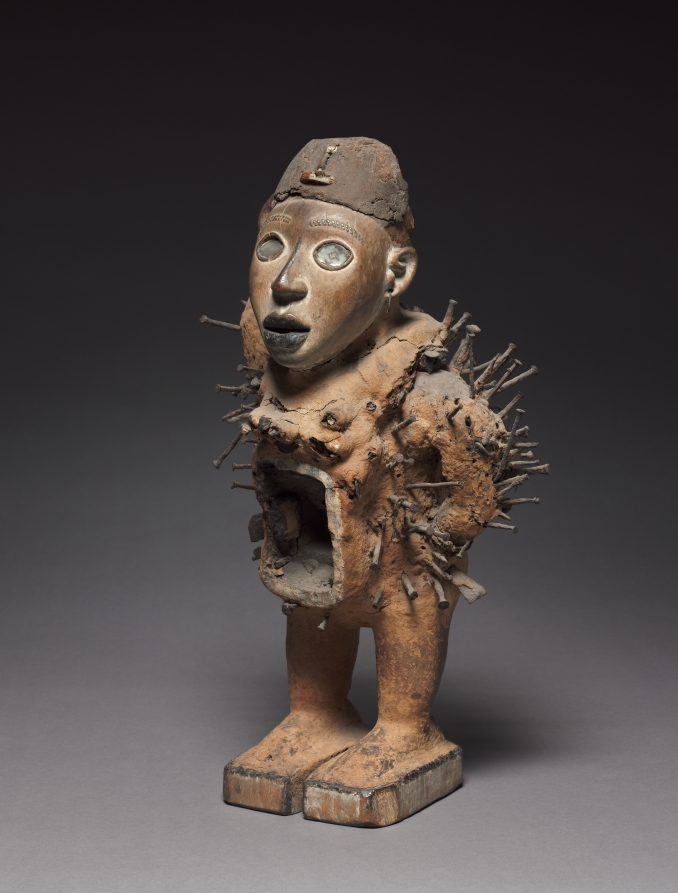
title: Male figure (nkisi nkondi)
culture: Democratic Republic of Congo or Cabinda (Angola), Kongo artist and nganga (priest)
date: late 1800s-early 1900s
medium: Wood, metalized glass, iron, organic material, ivory or plastic, and natural fiber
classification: Sculpture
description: This nkisi nkondi (power figure) lacks most of the materials that transformed it into a vessel for a spirit. Carved by sculptors, minkisi hosted spirits after banganga (priests) placed substances inside to empower them. The mirrored eyes, resin cap, and stomach chamber once contained empowering materials. After the nkisi had served its purpose the nganga removed the materials, stripping it of its spiritual power; the remaining sculpture was discarded. Sometimes, Kongo people removed materials as acts of anti-colonial resistance, disempowering minkisi before Europeans seized them. While we don’t know why it was disempowered, this sculpture is no longer spiritually active.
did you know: A mix of locally made and imported metal nails, blades, and screws cover this figure.